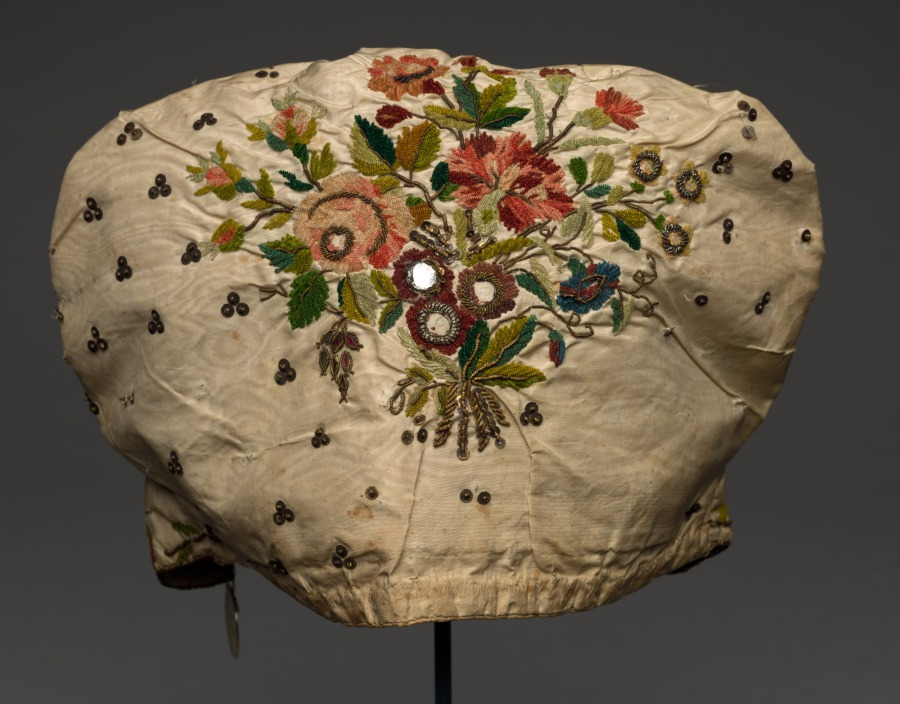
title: Headdress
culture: France, 18th century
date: 1700s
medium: silk, metallic thread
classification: Garment